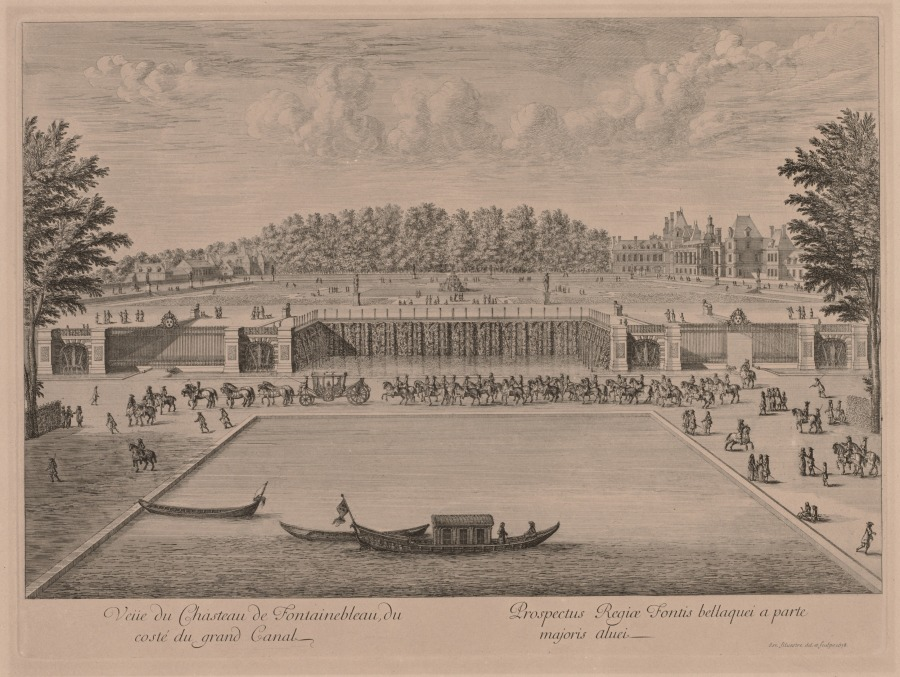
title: Chateau Fontainebleau from the Grand Canal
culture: France, 18th century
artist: Jacques Rigaud (French, 1681–1754)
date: c. 1720–50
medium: engraving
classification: Print